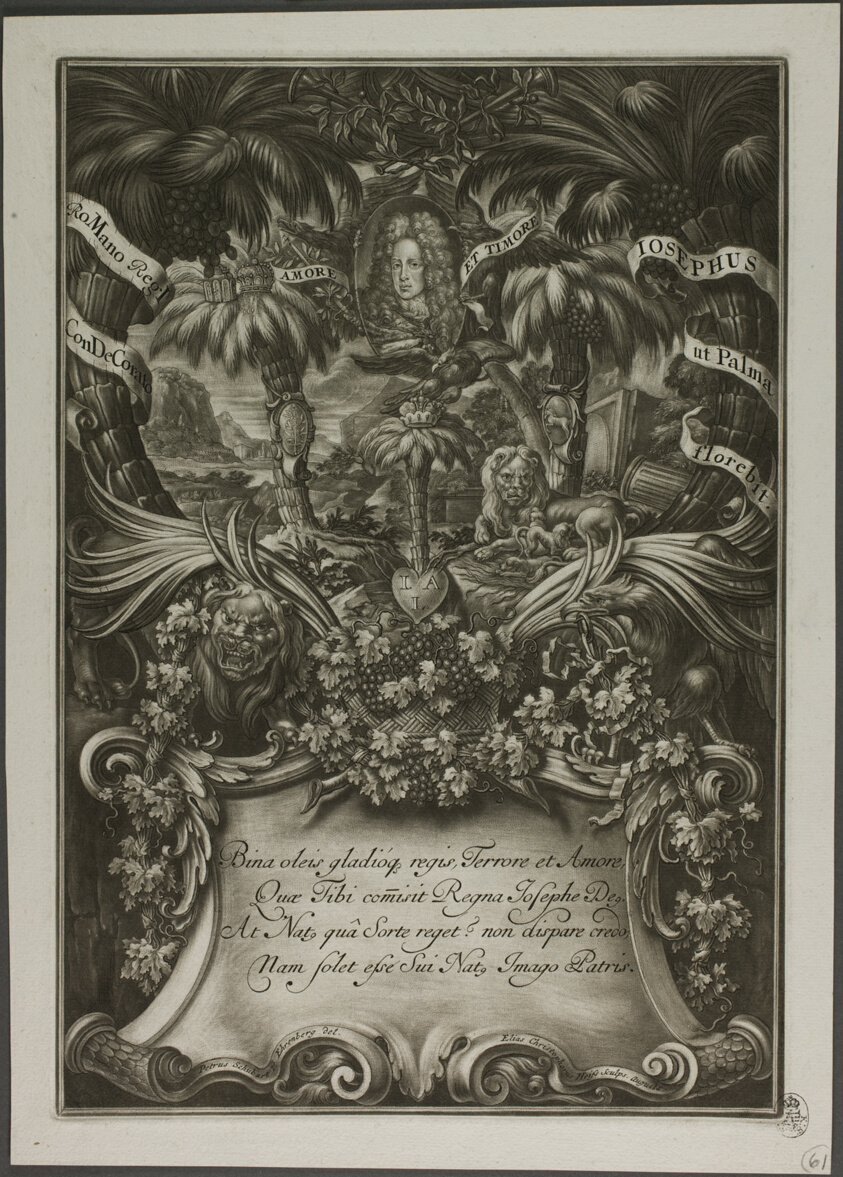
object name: Print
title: Portrait of Joseph I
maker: Christoph Elias Heiss (German, 1660-1731)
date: 1701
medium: Mezzotint on ivory laid paper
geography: Germany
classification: mezzotint; prints and drawing; print